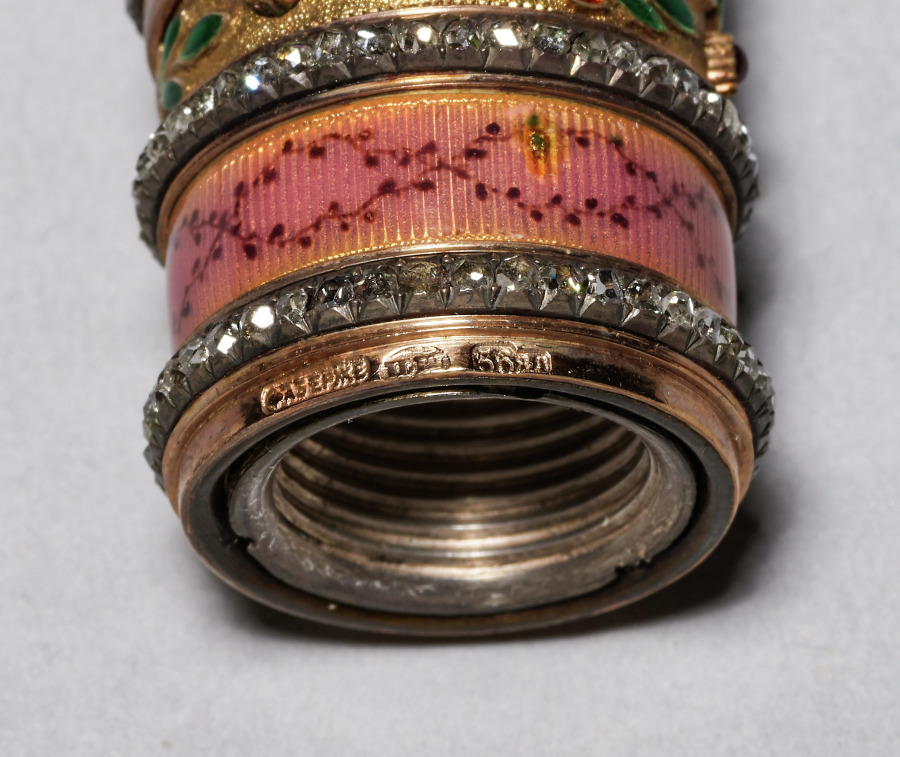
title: Parasol Handle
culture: Russia, St. Petersburg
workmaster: Michael Evlampievich Perchin (Russian, 1860–1903)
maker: House of Fabergé (Russian, 1842–1918)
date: c. 1886–1903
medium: Gold, enamel, diamonds, and platinum filigree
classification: Metalwork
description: Women devised many methods to protect themselves from the sun when strolling outside at the end of the nineteenth century. One constant barrier from the harsh rays was the daytime parasol which looked like an umbrella but was used strictly for shade. The House of Fabergé specialized in providing fashionable wealthy ladies with bejeweled handles such as this example, which could be screwed directly into the end of the parasol shaft when a more formal look was desired.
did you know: A wealthy lady around 1900 could unscrew her jeweled parasol handle and take it with her for safekeeping or swap it for another color.